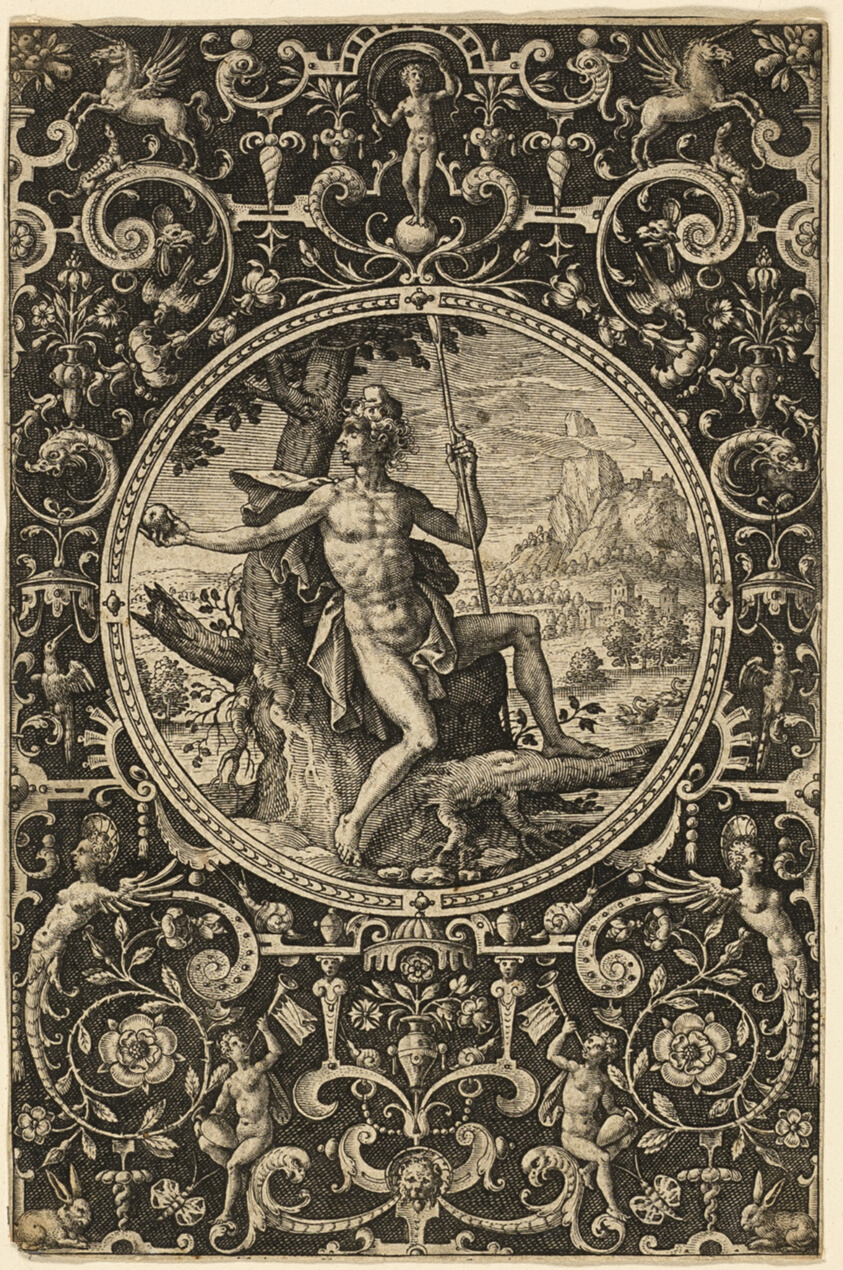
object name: Print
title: Judgment of Paris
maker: Adriaen Collaert, II; Flemish, 1560-1618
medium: Engraving on paper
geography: Flanders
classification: engraving; print; prints and drawing